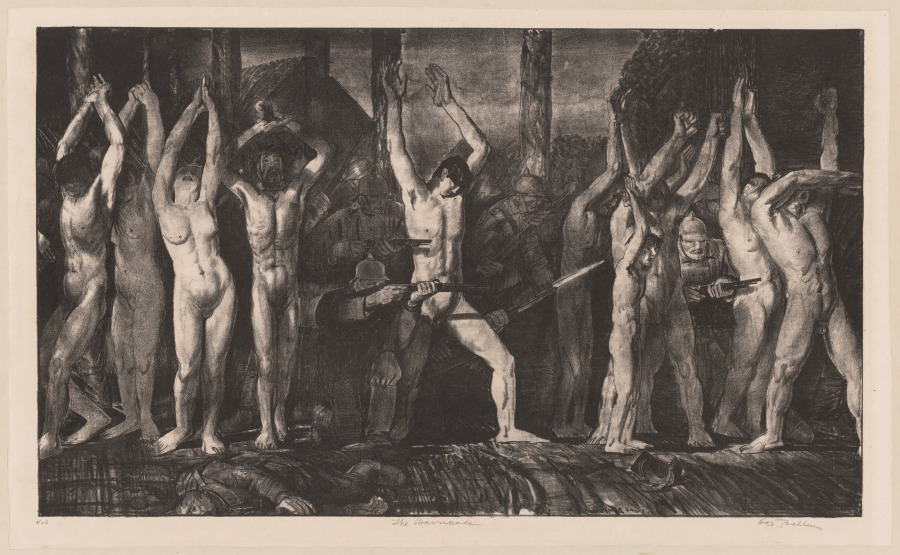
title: The Barricade, Second Stone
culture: America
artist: George Bellows (American, 1882–1925)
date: 1918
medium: lithograph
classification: Print